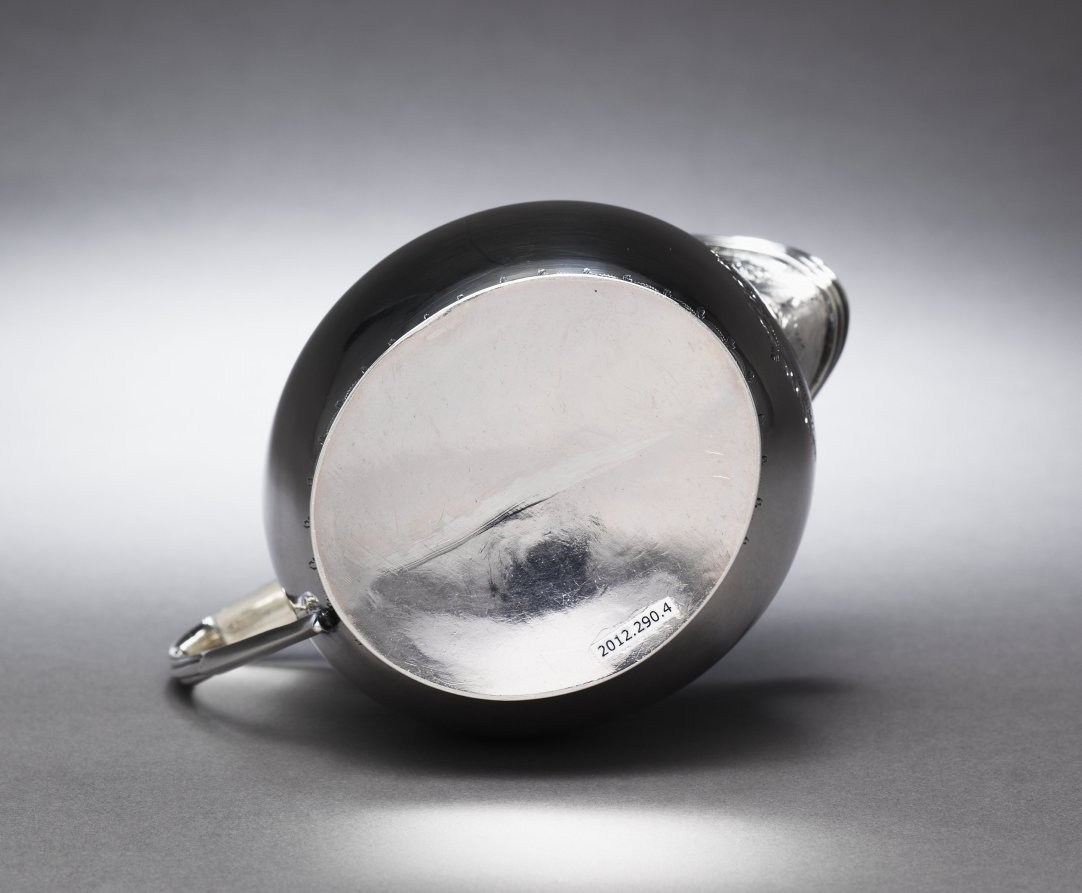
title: Tea Service (Creamer)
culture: London, England, 19th century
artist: Anne Bateman (British, 1748–1813)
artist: Peter Bateman (British, 1740–1825)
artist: William (I) Bateman (British, 1774–1850)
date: 1807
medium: silver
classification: Silver